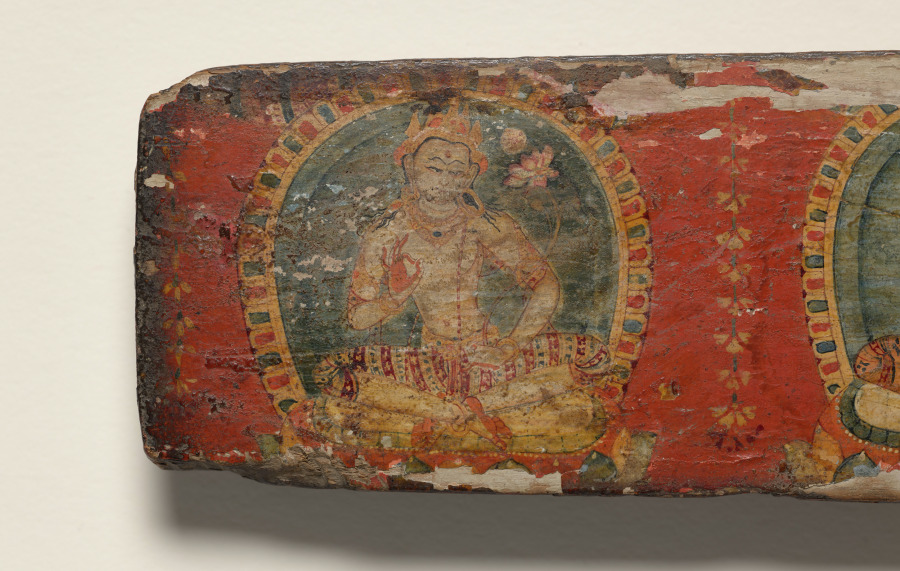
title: Four bodhisattvas and two attendants flanking Vajrasattva, bottom cover, from a Manuscript of the Perfection of Wisdom in Eight Thousand Lines (Ashtasahasrika Prajnaparamita-sutra)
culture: Eastern India, Bihar, Vikramashila Monastery. Painting: Nepal, Kathmandu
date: Sunday, September 14, 1119 (year 239 of the Newar Samvat in the month of Ashvina)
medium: Gum tempera, paper, and colors on wood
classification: Painting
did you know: The diamond pattern at the holes references the ribbons and cords that would have bound the book together.